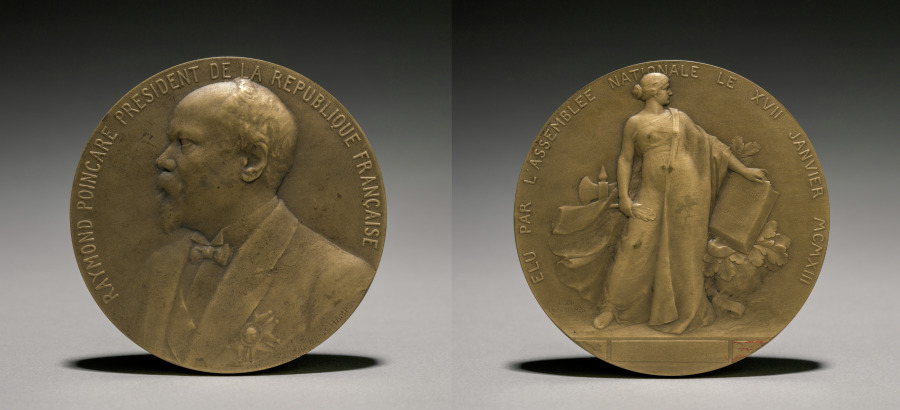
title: Poincarè Medal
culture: France, 20th century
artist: Léon Julien Deschamps (French, 1860–1928)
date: 1900s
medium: bronze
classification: Metalwork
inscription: obverse - "Raymond Poincarè President de la Republique Francaise." reverse - woman holding book on which is inscribed: "Poincarè President de la Republique Francaise"; above: "Elu par l'assemblee nationale le XVII Janvier MCMXIII."